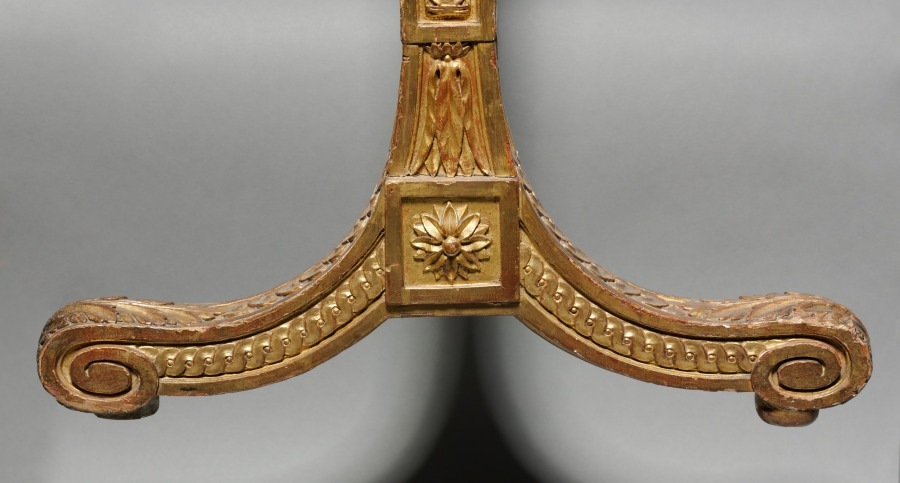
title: Fire Screen (Écran de Cheminée)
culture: France, Paris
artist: Georges Jacob (French, 1739–1814)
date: c. 1780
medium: gilt wood, upholstery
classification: Furniture and woodwork